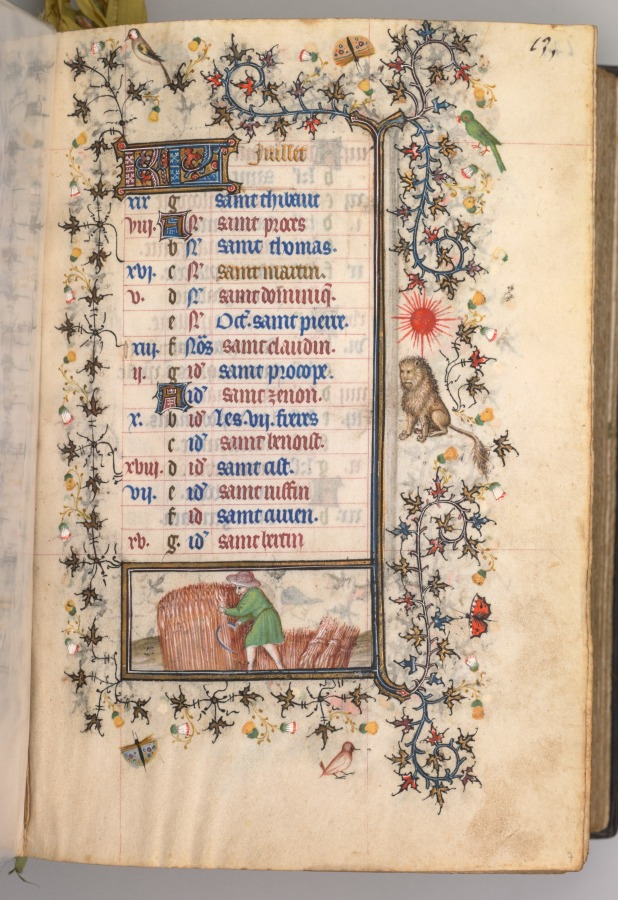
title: Hours of Charles the Noble, King of Navarre (1361-1425): fol. 7r, July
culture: France, Paris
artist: Master of the Brussels Initials and Associates (French)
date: c. 1405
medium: ink, tempera, and gold on vellum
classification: Bound Volume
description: This precious volume was obviously highly prized by its owner, the French-born King of Navarre, who had his coat of arms painted on no less than twenty folios. Rather than directly commissioning this manuscript from a specific workshop, it seems that Charles the Noble acquired his book of hours -- perhaps ready-made for the luxury market -- while on a trip to Paris in 1404-05. A collaborative effort, six painting styles are evidenced within the pages of this codex, those of two Italians, two Frenchmen, and two Netherlanders. The painter who was responsible for the planning and decoration of the book, and who produced seventeen of the large miniatures, was a Bolognese artist known as the Master of the Brussels Initials. His principal assistant, responsible for most of the borders, was a Florentine who signed his name "Zecho" da Firenze on folio 208 verso.